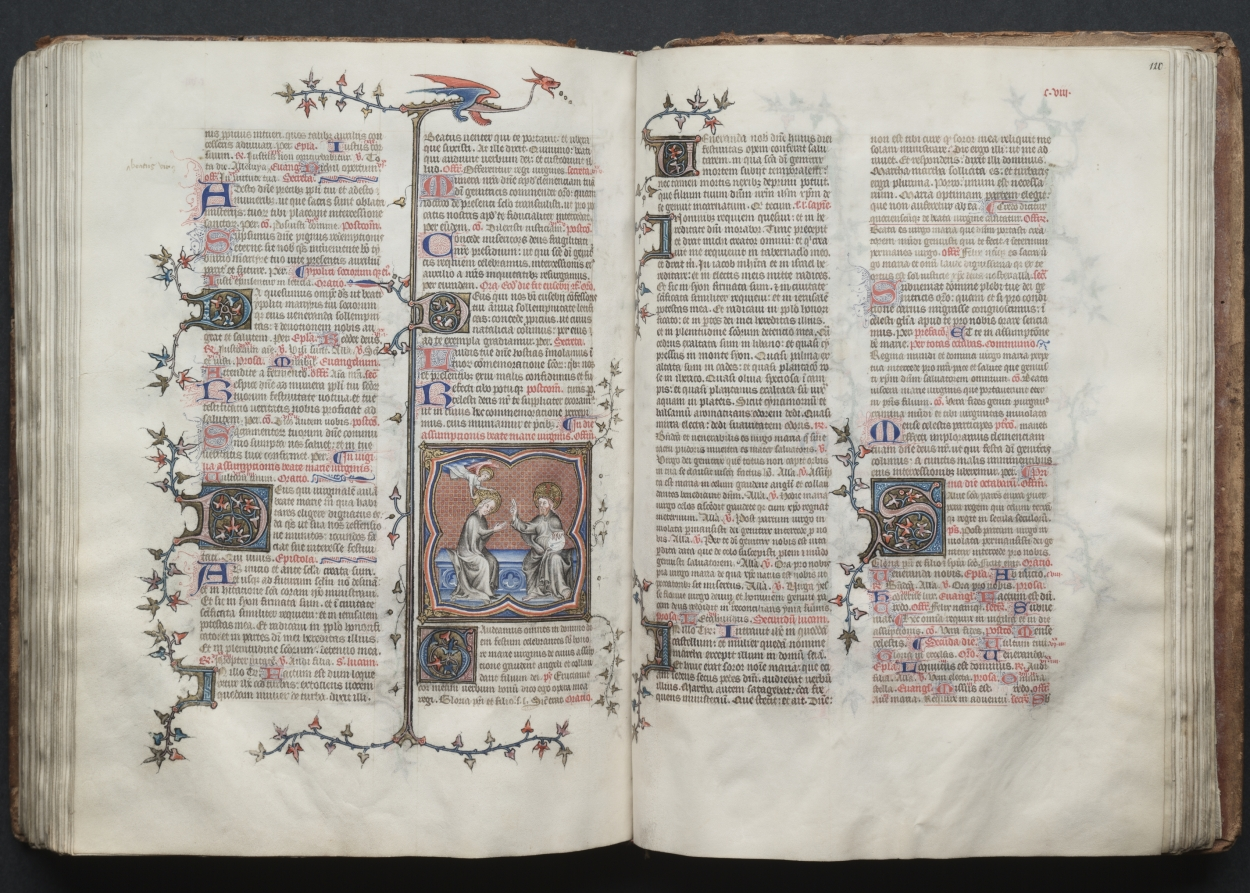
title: The Gotha Missal: Fol. 120r, Text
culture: France, Paris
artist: Master of the Boqueteaux (French)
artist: and Workshop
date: c. 1375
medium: ink, tempera, and gold on vellum; blind-tooled leather binding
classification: Bound Volume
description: The style and quality of this manuscript's decoration is typical of deluxe Parisian books made for aristocratic or royal patrons. Most of the book's decoration appears to be the work of the Master of the Boqueteaux, an artist active at the court of King Charles V (died 1380). His style was apparently shared by a number of book illuminators working in and around Paris. It is very possible that the Gotha Missal belonged to Charles V, but is not provable because the manuscript has no royal portraits and lacks a colophon. Given the book's magnificent decoration, however, it would seem that it was produced for a Valois prince, if not for the king himself. The manuscript receives its name from the German dukes of Gotha, its later owners.